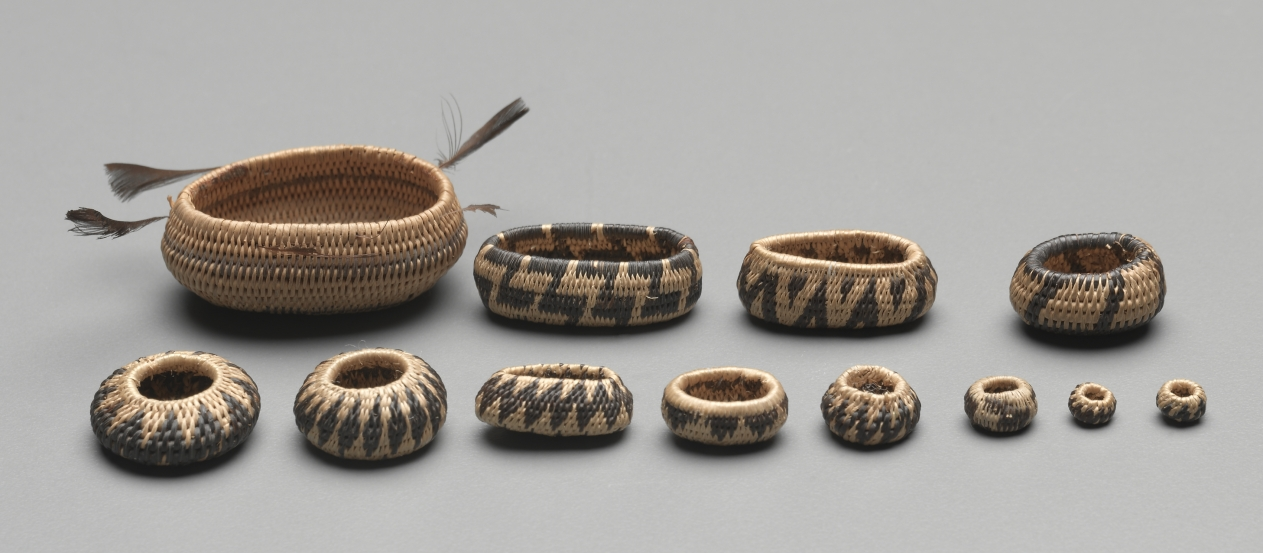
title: Miniature Round Basket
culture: California, Pomo, late 19th-early 20th century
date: late 1800s-early 1900s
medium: plant materials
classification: Basketry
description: Miniature baskets were made to demonstrate the basket-maker’s virtuoso skill, and these tiny marvels seem to be no exception -- the smallest are just a few millimeters wide but still patterned. For such fine work, dexterity was required as much for preparation of materials as for weaving.